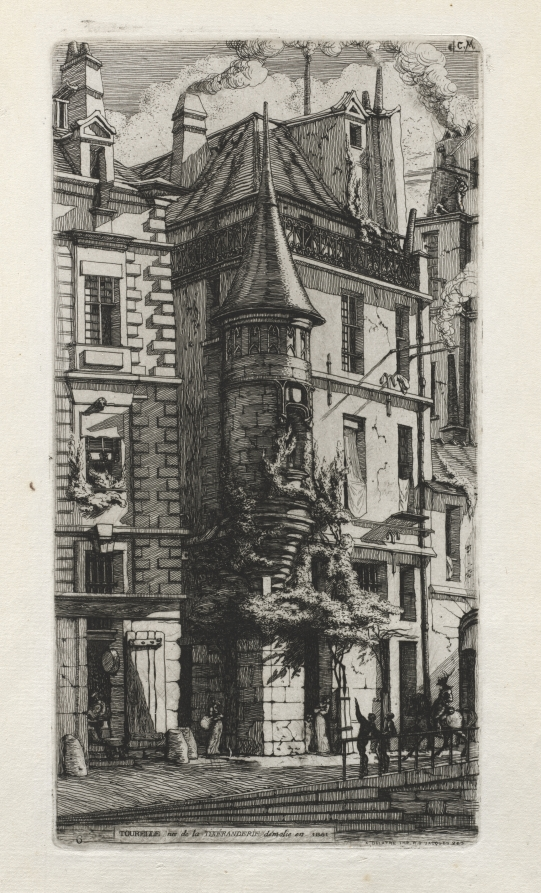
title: House with a Turret, rue de la Tixéranderie, Paris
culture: France, 19th century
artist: Charles Meryon (French, 1821–1868)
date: 1852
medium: etching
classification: Print